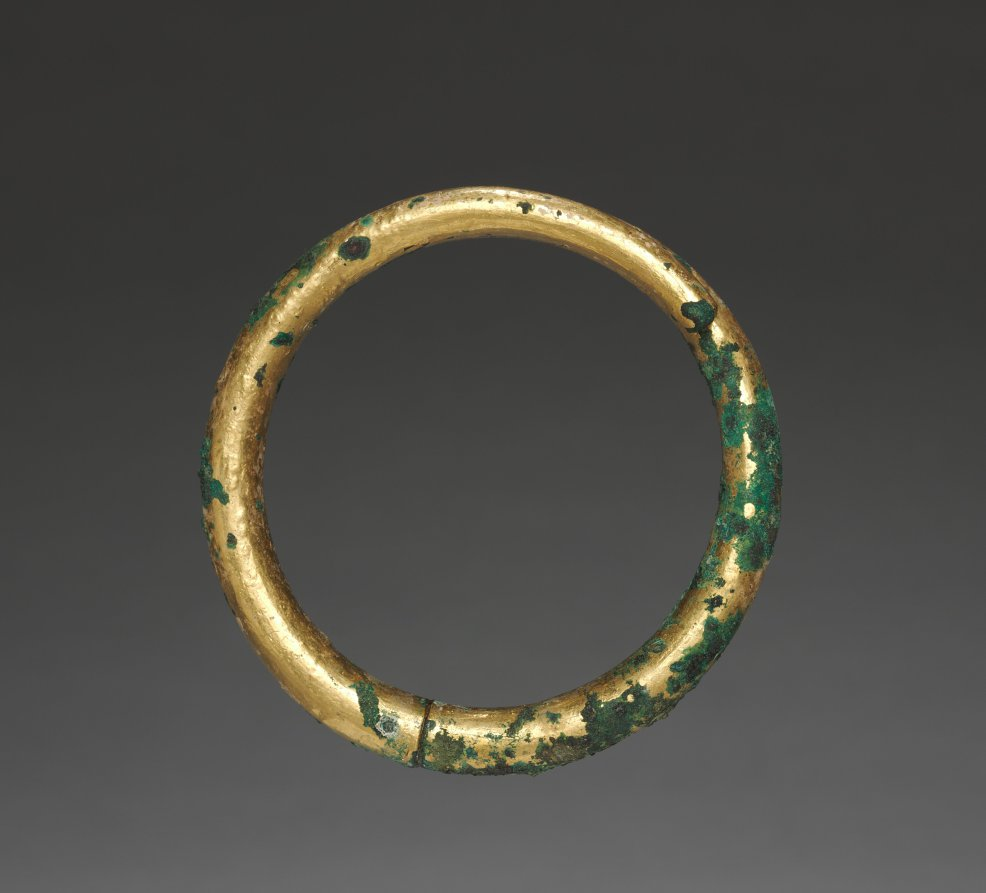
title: Bangle (2 of 2)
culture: India, Shunga period (185–78 BCE)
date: 185–72 BCE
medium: gilt bronze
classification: Jewelry